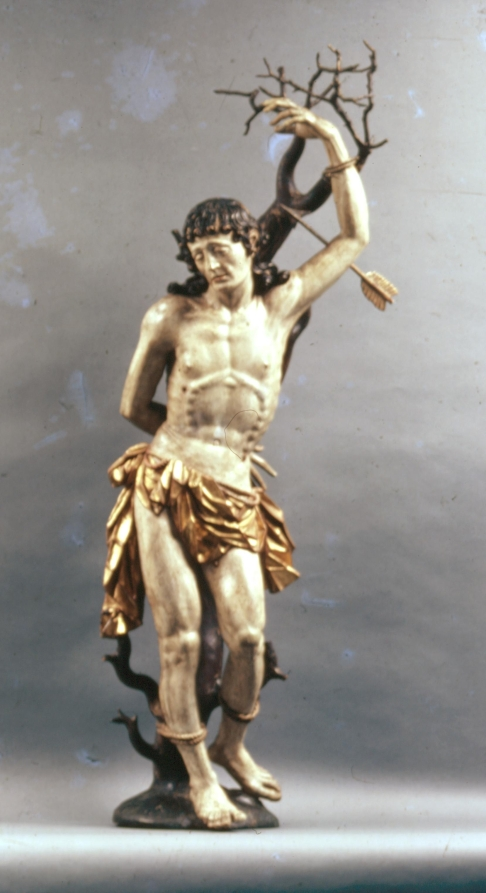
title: Saint Sebastian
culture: Germany, early 17th century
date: c. 1600–1620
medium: painted and gilded wood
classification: Sculpture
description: An early Christian saint and martyr, Sebastian was condemned to death by the Roman emperor Diocletian. Bound to a tree and shot with arrows, he survived—only later to be martyred by beating. This figure embodies the blend of stylistic influences that characterized German sculpture in the early 1600s. The graceful pose and anatomical naturalism of the legs indicate the influence of Italian Mannerism, while the crisp, stylized patterns of Sebastian’s hair and loincloth recall German Gothic works from the 1400s. The tree to which Sebastian is bound is an actual branch, shaped and refined to its present appearance.